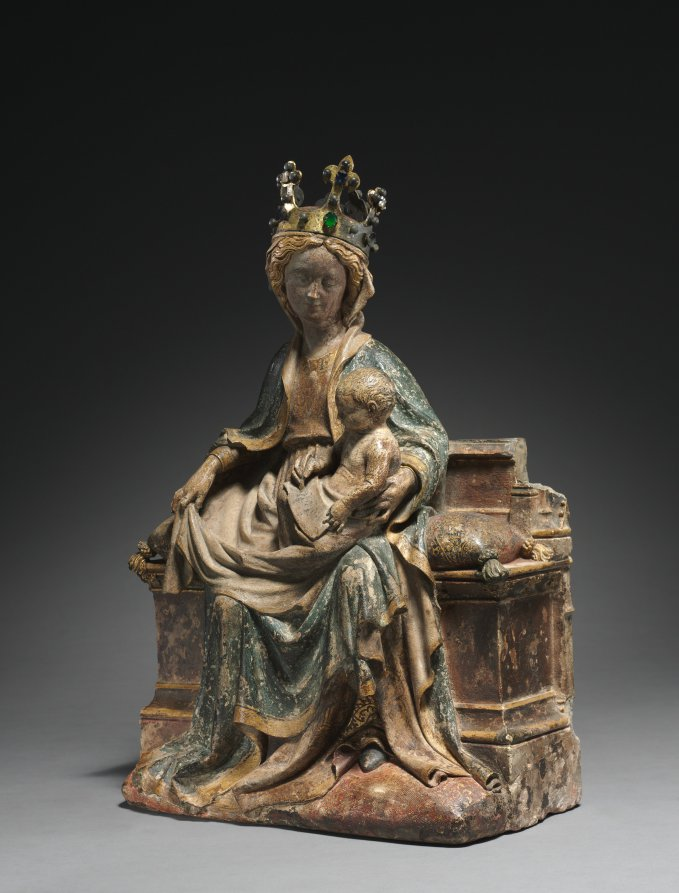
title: Enthroned Virgin with the Writing Christ Child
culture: Franco-Netherlandish, active Paris(?), 15th century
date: c. 1400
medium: limestone with polychromy and gilding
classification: Sculpture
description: This sculpture belongs to a tradition of seated Virgins that were prominent in Netherlandish art in the decades around 1400, and by extension may be associated with the Valois courts at Paris, Dijon, and Bourges. The theme of the Christ child who writes into an open book or onto a vellum banderole emerged during the third quarter of the 14th century and had great appeal among ecclesiastical and aristocratic clients. It undoubtedly refers to the educating and nurturing role of the mother in teaching the child, but also to the future position of the adult Christ as author and teacher. The small scale of this sculpture and the fact that its back is uncarved suggest that it was made for a small alcove or niche, appropriate in the intimate setting of a small chapel or oratory. The sculpture would have primarily been viewed from the front and perhaps from slightly below.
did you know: Here the Virgin is sitting on a highly decorated pillow.